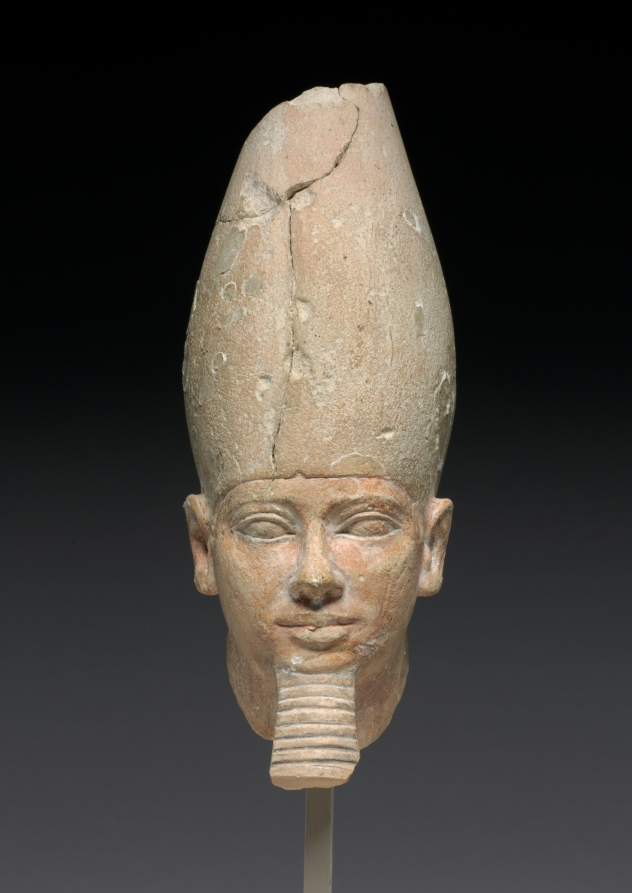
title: Head of King Userkaf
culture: Egypt, Old Kingdom (2647–2124 BCE), Dynasty 5, reign of Userkaf (2496–2491 BCE)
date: c. 2454–2447 BCE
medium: painted limestone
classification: Sculpture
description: Despite the monumental achievements of the Old Kingdom’s Pyramid Age, few images of its rulers survive. This head has been identified as King Userkaf, the first king of Dynasty 5. Userkaf built a modest pyramid at Saqqara and a temple to the sun god Ra at Abusir. According to later tradition, the first three kings of Dynasty 5 were the children of Ra himself and a mortal woman. From Userkaf’s reign on, the kings of Egypt were called "Sons of Ra." Here, Userkaf wears the two basic items of regalia that identify him as king: the tall, conical White Crown of Upper (southern) Egypt, and the royal false beard.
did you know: Visible chisel marks on the side of the crown imply that another figure once stood to the king's right; only a god or goddess could have stood in this prominent position.